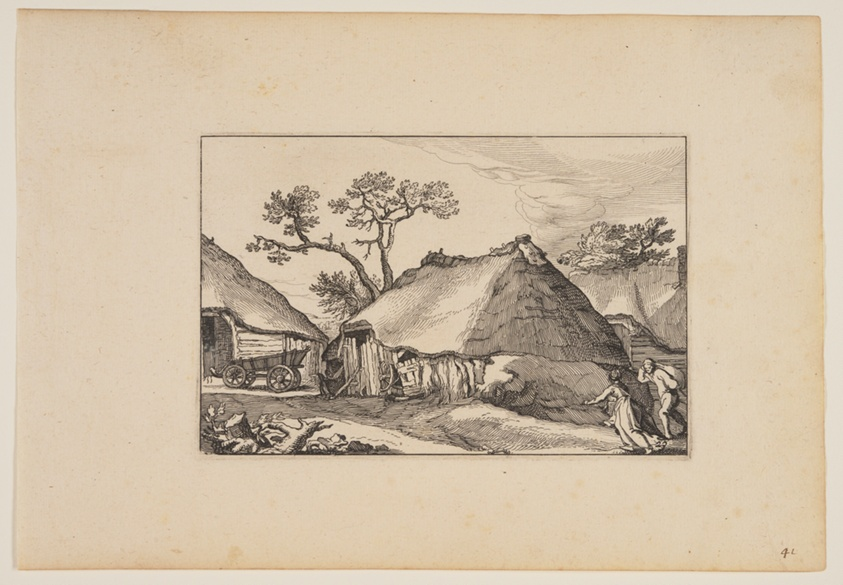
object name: Print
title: Two Barns, Cart at Left, from Landscapes (Verscheyden aerdige Lanthuysen...)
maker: Claes Jansz. Visscher (Netherlandish, c. 1550–c. 1612); after Abraham Bloemaert (Dutch, 1566–1651)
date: 1620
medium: Etching on ivory laid paper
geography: Netherlands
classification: print; paper; prints and drawing; etching